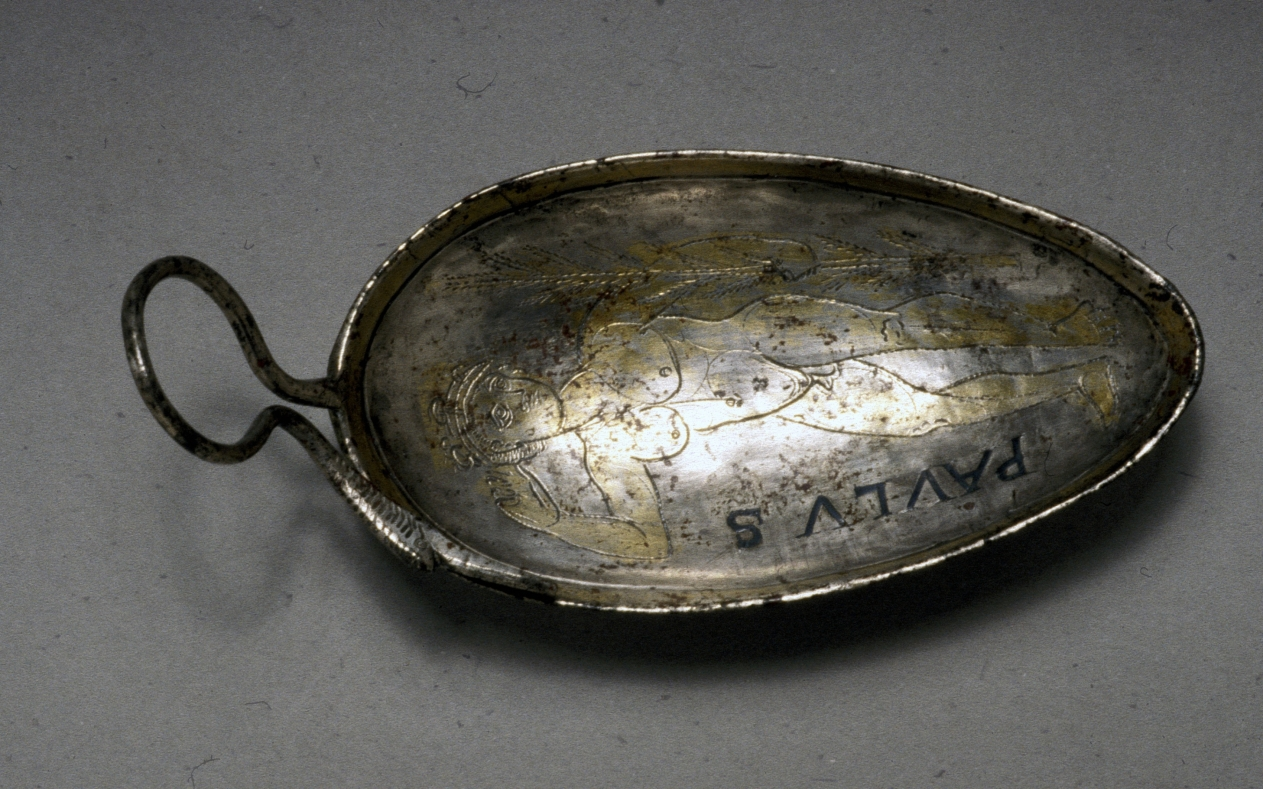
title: Spoon with Saint Paul as an Athlete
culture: late Roman Empire, perhaps Syria, early Byzantine, 4th century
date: 350–400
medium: silver, silver gilt, and niello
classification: Metalwork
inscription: the interior of the bowl contains an inscription filled with niello giving the Latin name of "PAVLVS."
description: Silver spoons with swan neck handles (ligulae) were popular in the Late Roman Empire. This late antique spoon is unique because it is decorated with the nude figure of a victorious athlete identified in an inscription as PAVLVS (Paul). It is tempting to interpret the juxtaposition of the name with a classical representation of an athlete as a subtle allusion to a passage in Saint Paul’s first letter to the Corinthians (1 Cor. 9:24-27), in which the apostle characterizes himself as an "athlete of Christ." While this interpretation may imply that the spoon’s owner was a Christian, it does not imply a religious function for the object, which was likely used for display or fine dining.